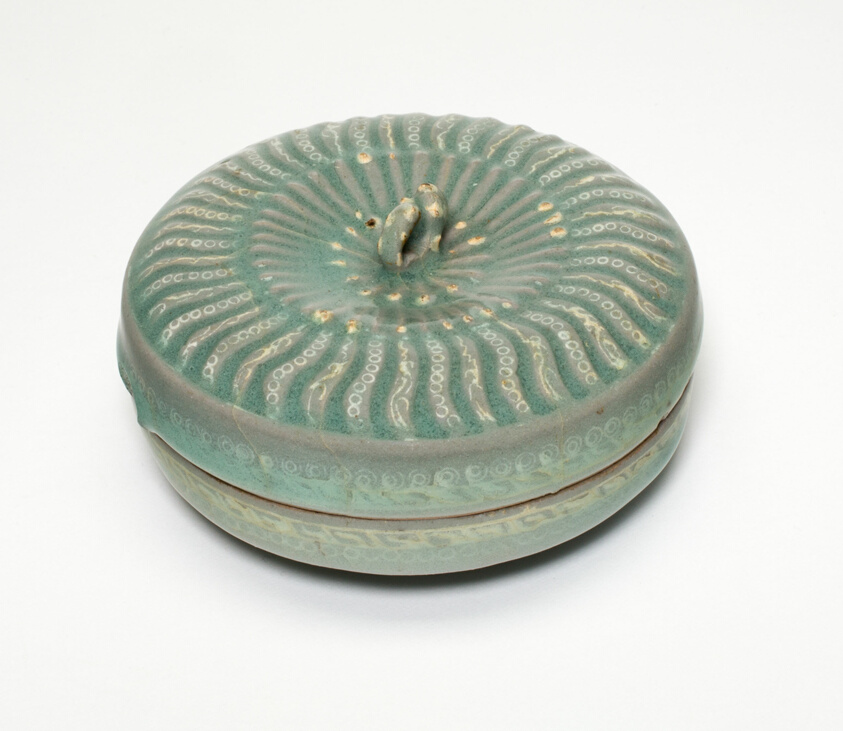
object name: Decorative Arts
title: Covered Box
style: Korean (culture or style)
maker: Korea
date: Goryeo dynasty (918–1392), late 13th century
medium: Stoneware with celadon glaze and red and white slip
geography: Korea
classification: stoneware; asian art; ceramics; decorative arts